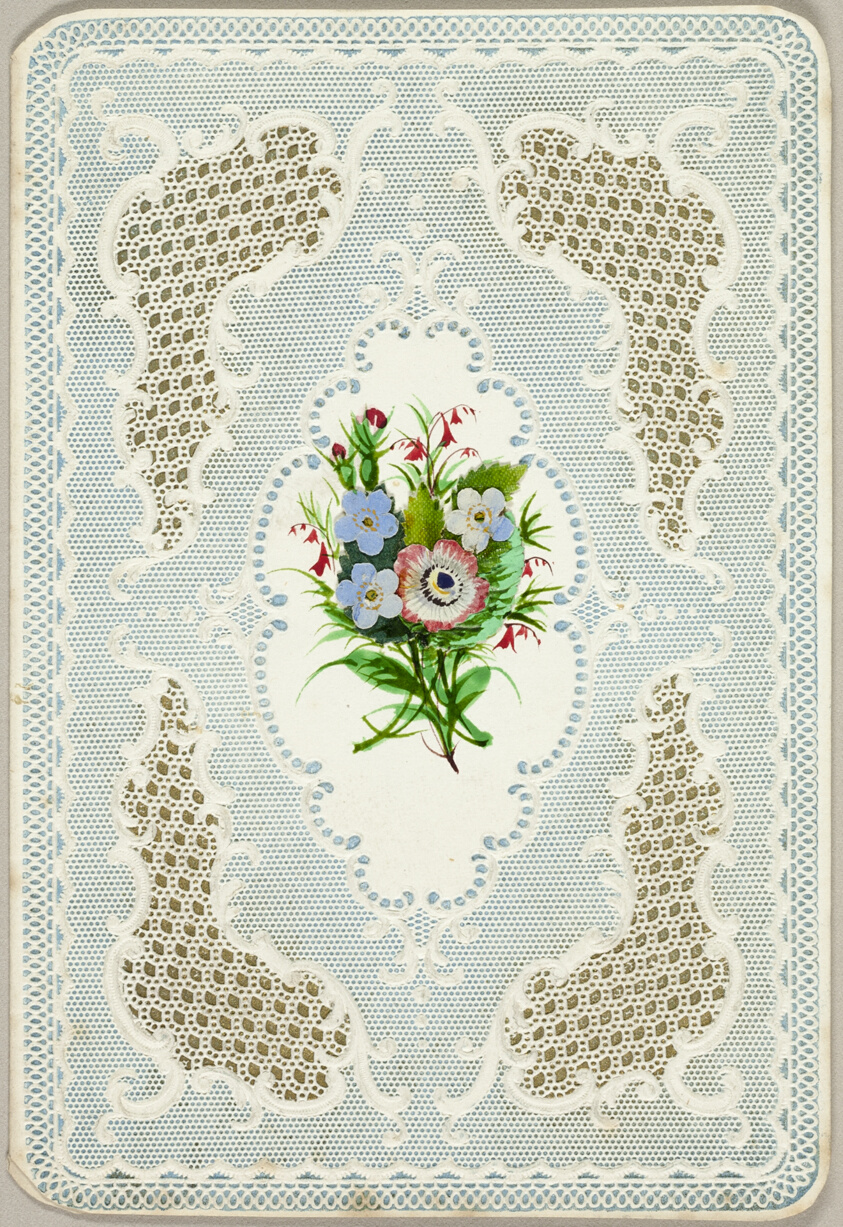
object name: Drawing and Watercolor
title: Untitled Valentine (Flowers)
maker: Unknown Artist; English, 19th century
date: 1840/50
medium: Collaged elements and watercolor on blue accented and embossed ivory wove paper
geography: England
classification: valentine; prints and drawing; paper